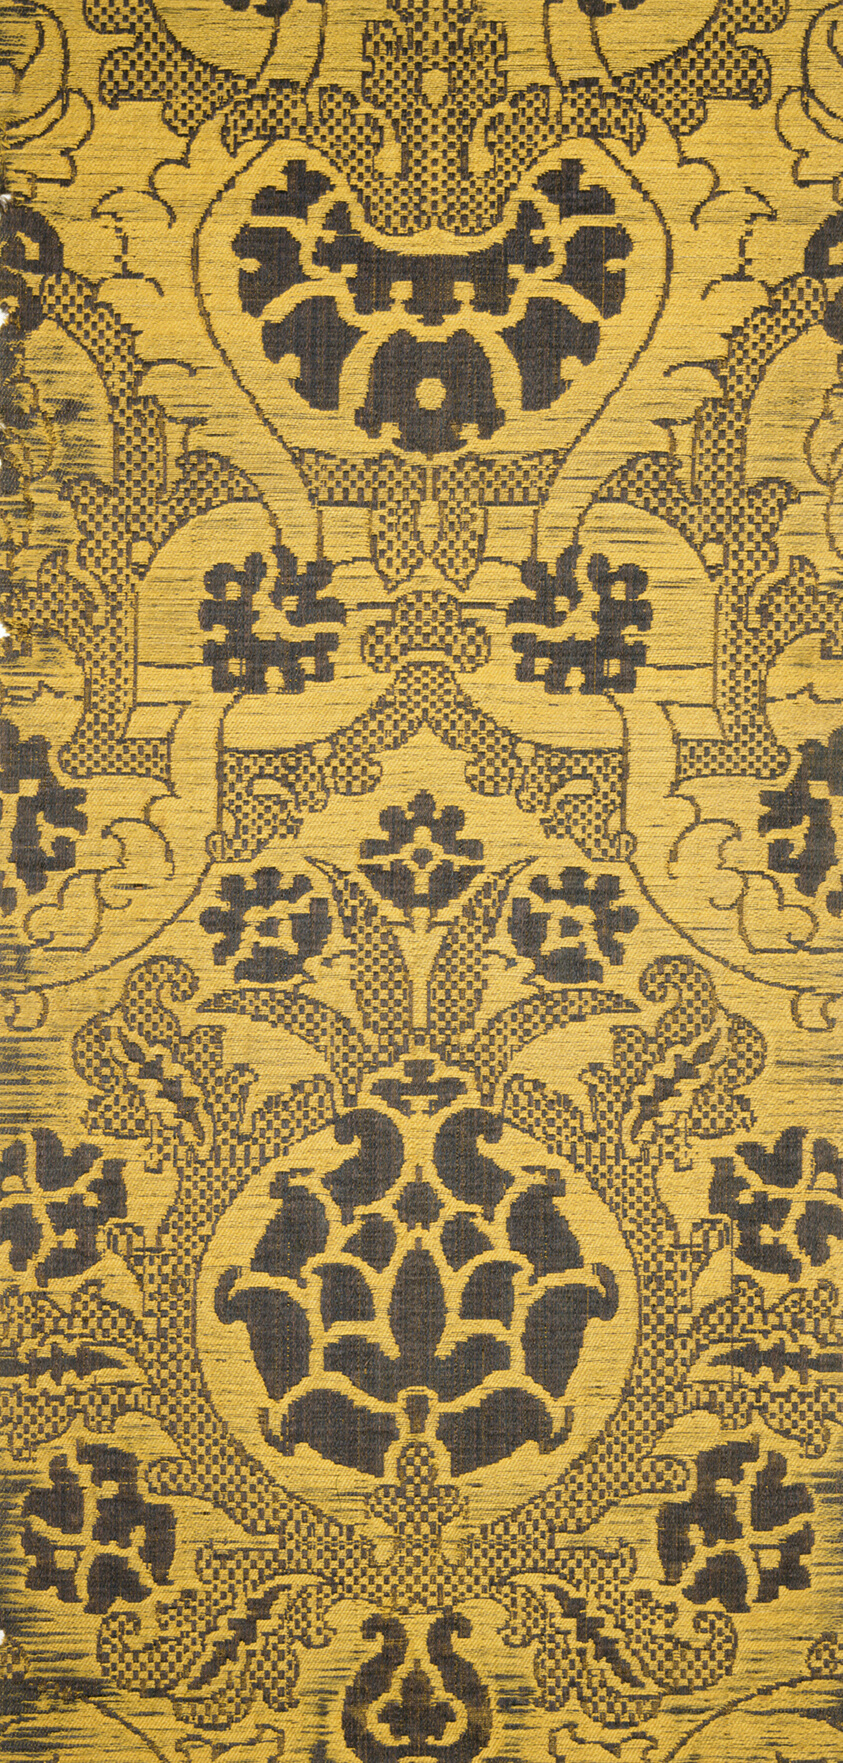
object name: Textile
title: Fragment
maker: Spain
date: 1525/75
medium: Silk, satin weave with twill interlacings of secondary binding warps and patterning wefts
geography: Spain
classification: textile; weaving